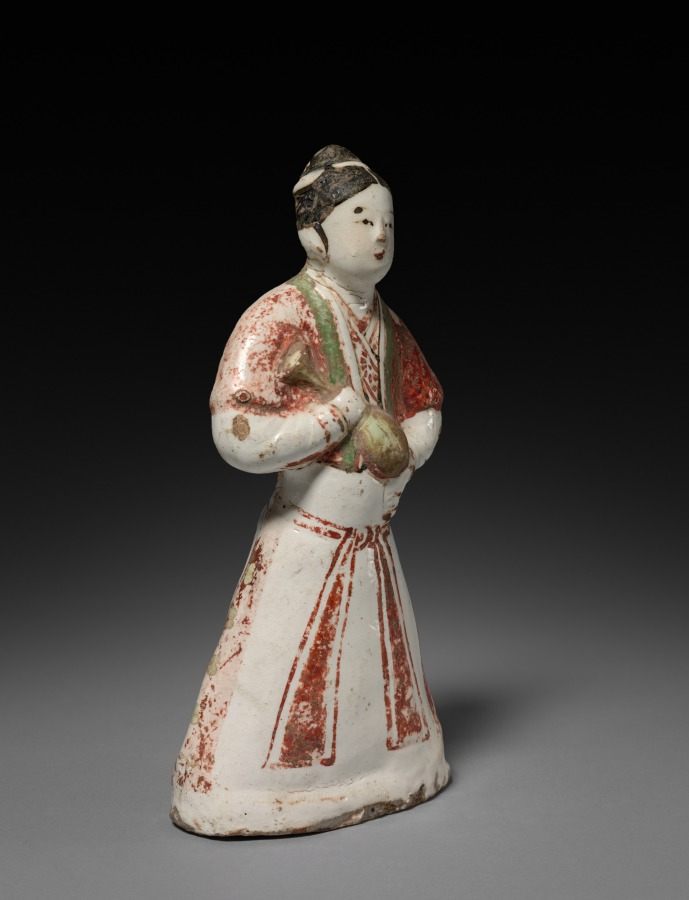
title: Lady Holding a Vase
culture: China, Northern Song dynasty (960-1127) - Jin dynasty (1115-1234)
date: 1100s–1200s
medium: Stoneware with slip decoration, Cizhou ware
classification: Ceramic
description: The Cizhou ware kilns never produced for the imperial court, but made potted utensils needed in daily life. They also fired ceramic figurines, which are believed to have been used as toys. The maid or palace lady here holds a long-necked vase of a type that watered flowers. The figurine, perhaps made as a toy for a girl, was molded in clay and covered with a white slip and transparent glaze, over which some colors in red, green, and ocher were applied. Cizhou kiln potters were one of the first in China who applied overglaze enamel-like colors on glazed, high-fired ceramics.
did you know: This hollow stoneware figure of a woman has firing hole visible at the bottom.